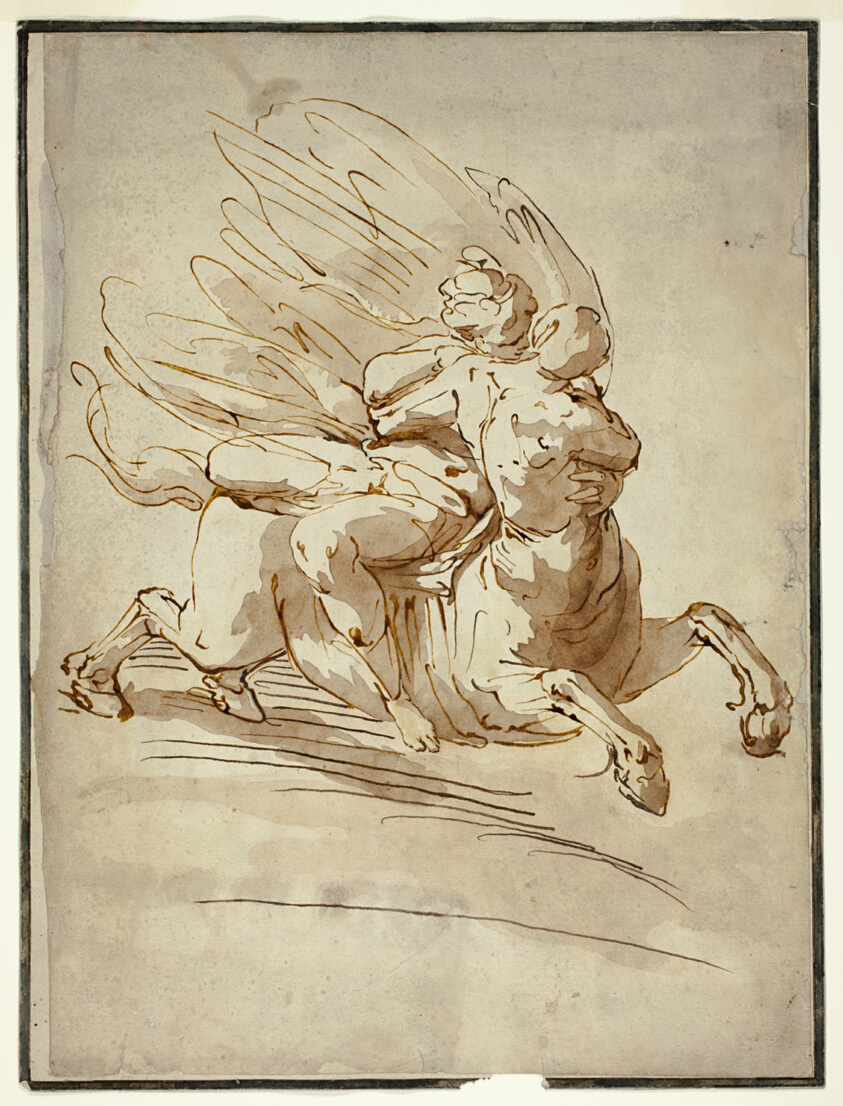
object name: Drawing and Watercolor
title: Rape of Deianira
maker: After Luca Cambiaso; Italian, 1527-1585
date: after c. 1575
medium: Pen and brown and reddish brown ink, with brush and reddish brown wash, on ivory laid paper, laid down on ivory laid paper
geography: Italy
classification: ink with wash; drawings (visual works); prints and drawing